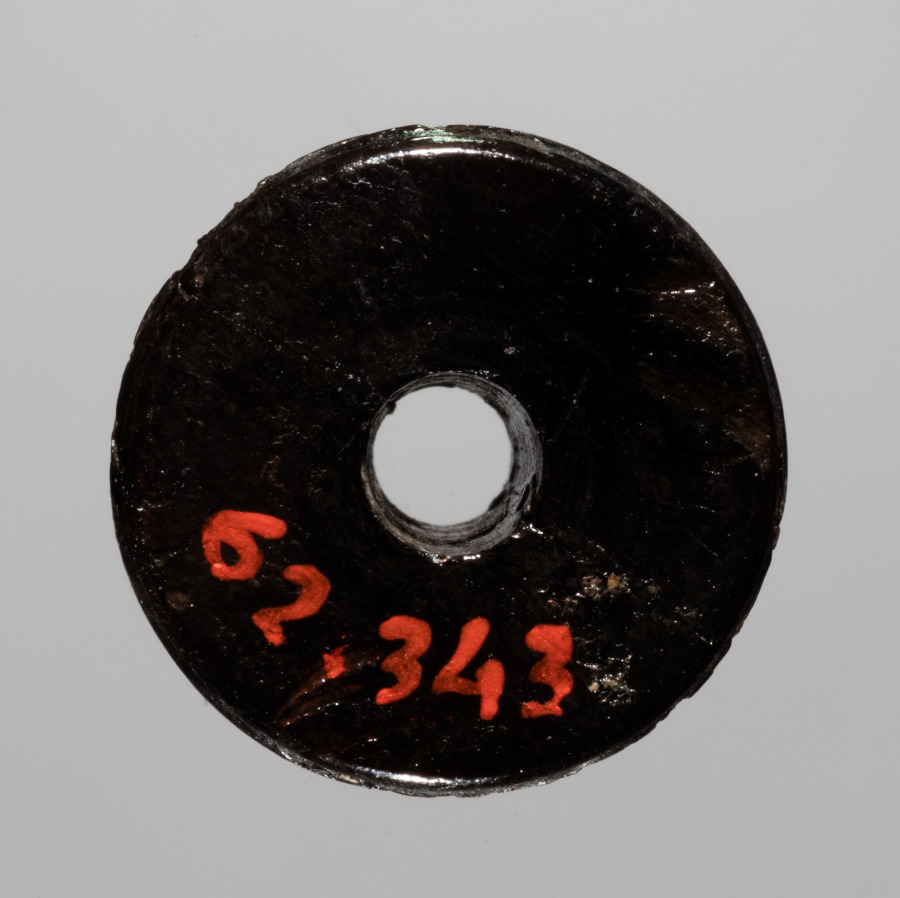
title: Spindle Whorl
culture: Iran, early Islamic period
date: 700s - 900s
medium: bone, incised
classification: Spindle Whorl